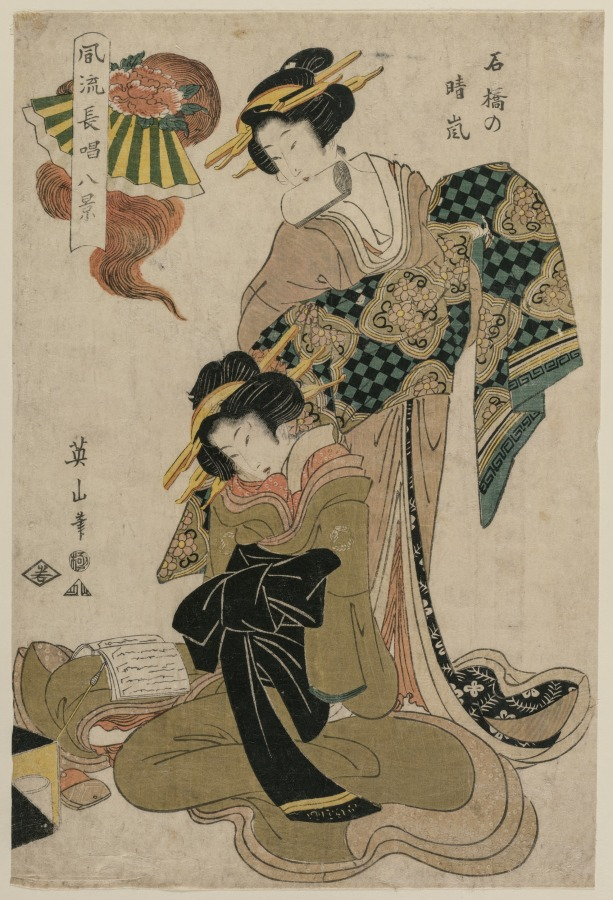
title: Haze on a Clear Day at Stone Bridge (From the series Eight Elegant Views of Chanted Accompanimnets for Kabuki Plays)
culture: Japan, Edo period (1615–1868)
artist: Kikukawa Eizan (Japanese, 1787–1867)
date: early 1810s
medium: color woodblock print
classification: Print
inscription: Signature: Eizan hitsu